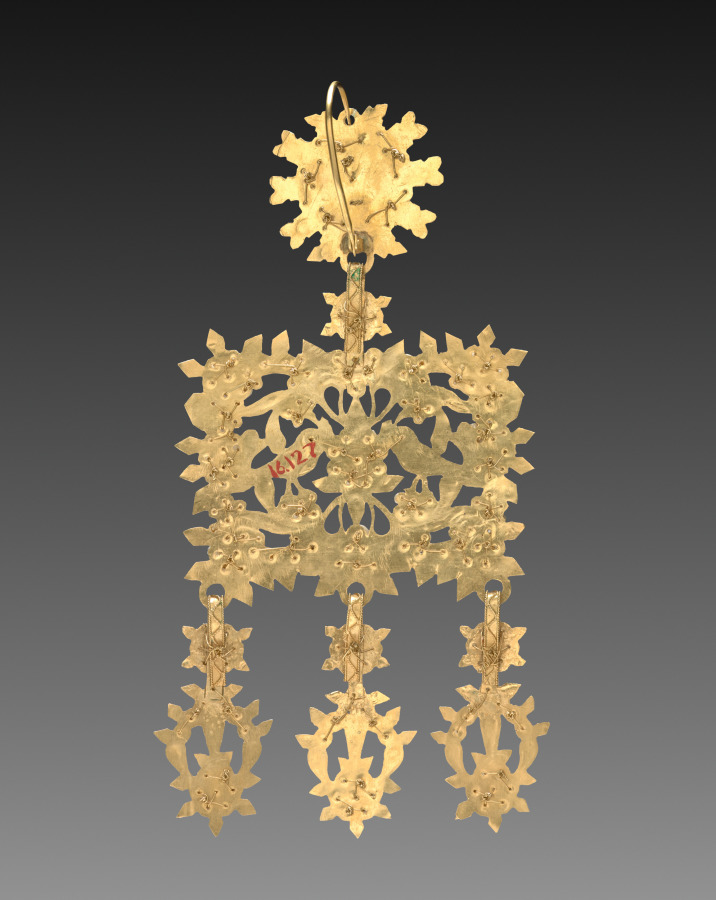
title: Earring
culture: Italy, Sardinia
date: 1700s - 1800s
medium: gold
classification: Jewelry